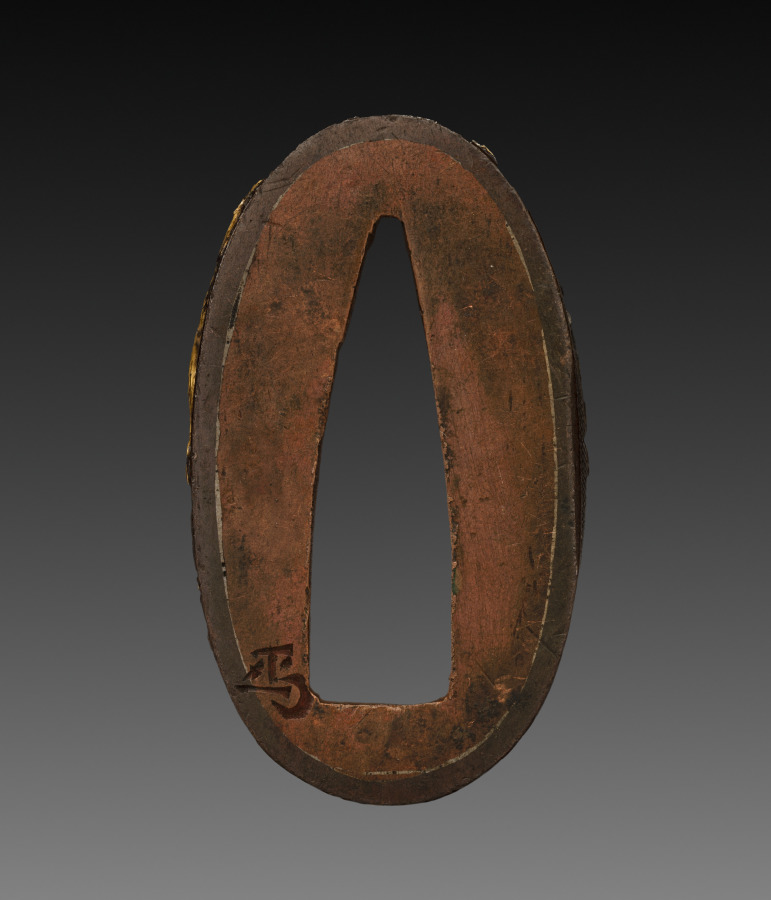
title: Sword-Hilt Collar (Fuchi) with Tiger in Bamboo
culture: Japan, Edo period (1615–1868)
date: 1700–1850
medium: shakudo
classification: Arms and Armor